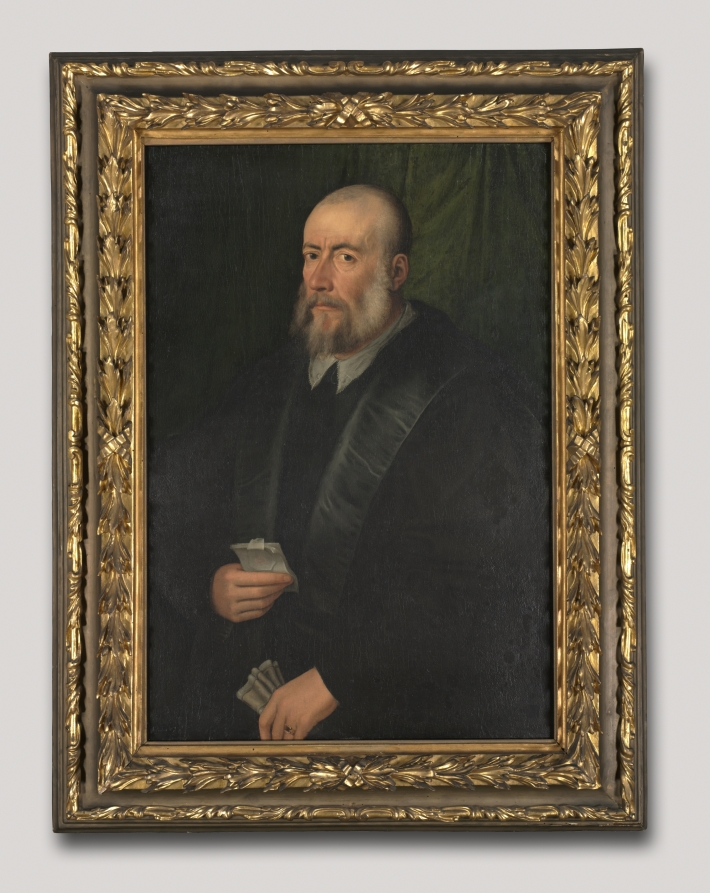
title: Portrait of an Old Man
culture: Italy, 16th century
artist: attributed to Giulio Campi (Italian, c. 1500–1572)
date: mid-1500s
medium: oil on wood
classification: Painting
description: Part of a distinguished family of Northern northern Italian painters, Campi depicts his sitter with an unidealized face dominated by carefully observed wrinkles. He stares out intently while grasping what may be a letter with its paper seal broken in his right hand. Despite this intense gaze the figure does not establish a lively connection with the viewer, and his mood remains distant and reserved, in keeping with Renaissance ideas about elegant comportment. Though his costume appears plain, the sumptuous black fabric was indicative of high status in some parts of Europe. --Michele Frederick (December 2011)